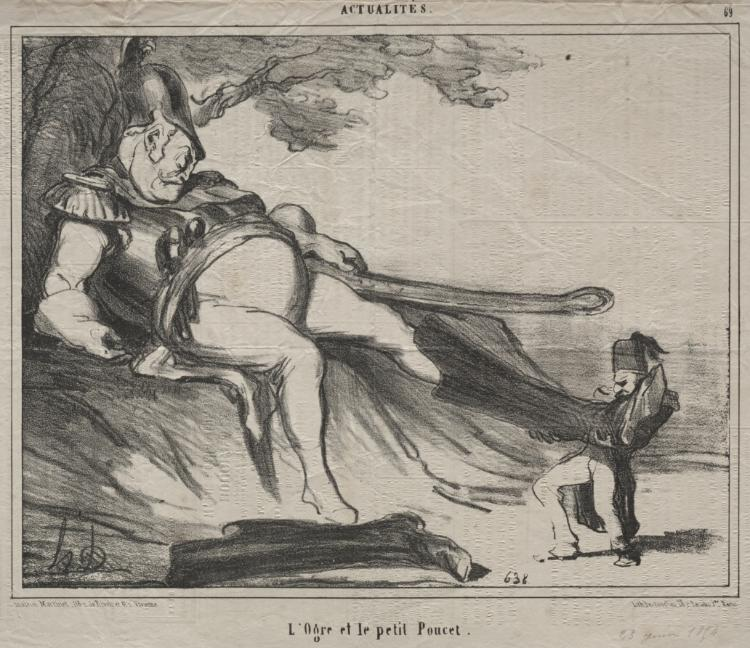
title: The ogre and his little Tom Thumb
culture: France, 19th century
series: News of the Day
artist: Honoré Daumier (French, 1808–1879)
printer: Destouches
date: 1854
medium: lithograph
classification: Print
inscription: Above image, printed: ACTUALITÉS. / 69 ; Below image, printed: L'Ogre et le petit Poucet.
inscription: Lower margin, printed: maison Martinet, 116, r. de Rivoli et 41, r. Vivienne / Lith. Destouches, 28, r. Paradis Pre. Paris. ; in pencil: 23 juin 1854 / 47.323 est val. $25 - / D.VII 2490 I/II ; verso, left margin, in pencil: TR8714/7 / [triangle with numbers] 2 3 5 / 2491 / 2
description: This print was published in Le Charivari (June 23, 1854) as plate 69 from the series News of the Day.